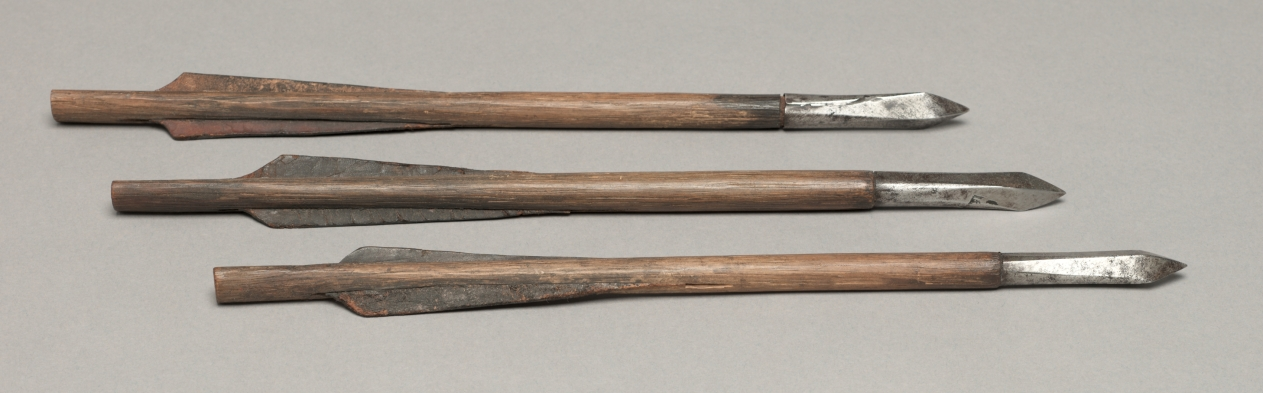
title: Crossbow Bolt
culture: Germany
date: 1500s–1600s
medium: wood, leather, steel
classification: Arms and Armor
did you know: Bolts with leather feathering were used mainly in the Tyrolean area, which includes northern Italy and western Austria.